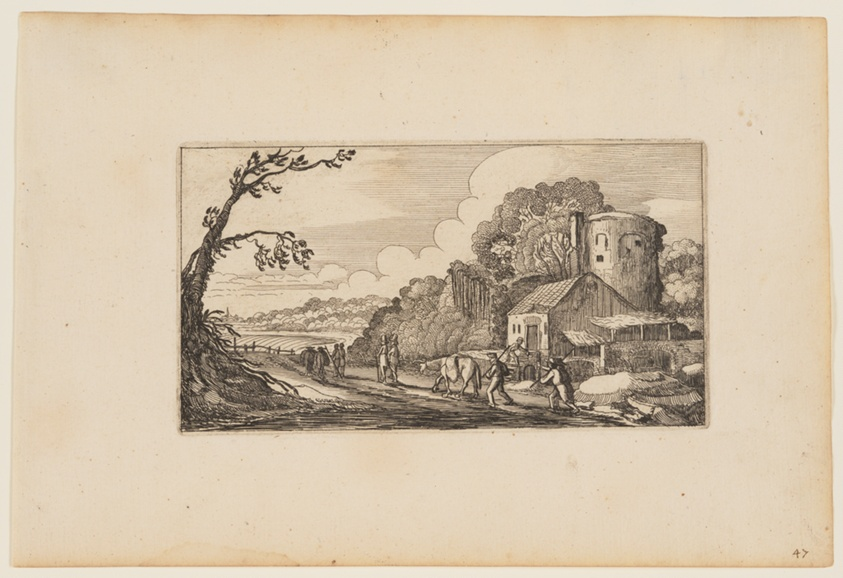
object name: Print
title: Path to Left of a Farm Dominated by a Round Tower, from Twelve landscapes with Figures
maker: After Gillis van Scheyndel; Dutch, 1595–1660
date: 1624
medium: Etching on ivory laid paper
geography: Netherlands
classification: etching; paper; print; prints and drawing